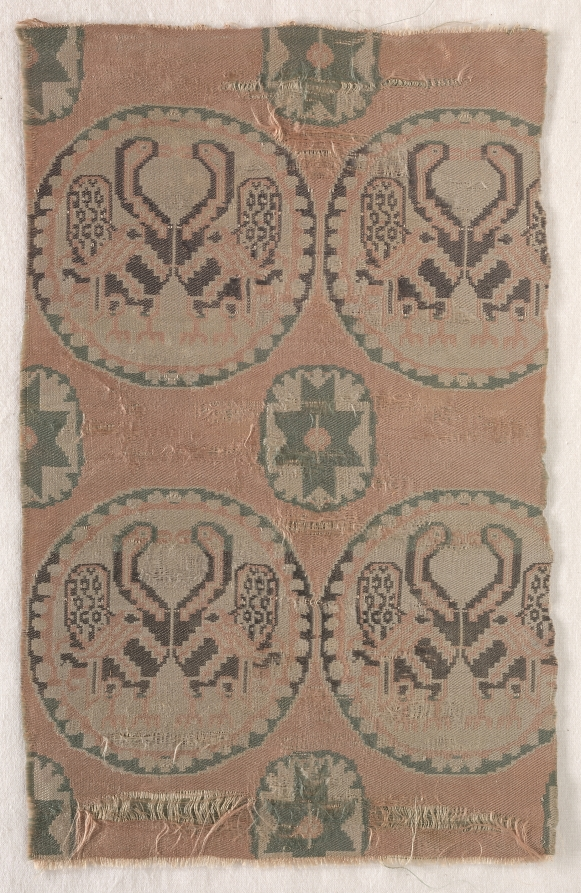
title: Textile with Paired Ducks in Roundels (Copy of a Medieval Silk)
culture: France, early 20th century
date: early 1900s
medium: compound twill weave woven on Jacquard loom; silk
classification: Textile